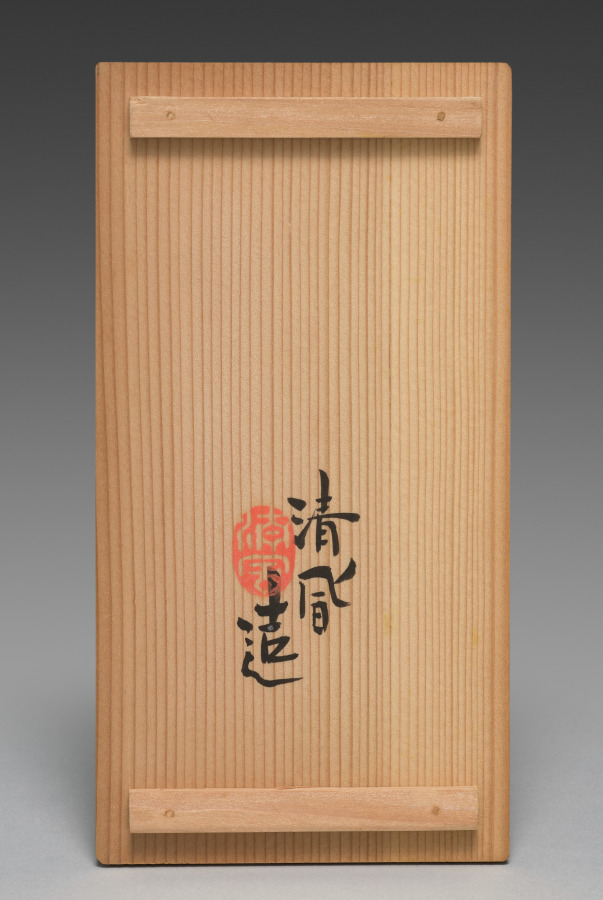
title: Sake Pourers with Crane and Tortoises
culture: Japan, Meiji period (1868–1912)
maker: Seifū Yohei III (Japanese, 1851–1914)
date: 1893–1914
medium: Pair of sake flasks; porcelain with overglaze color enamel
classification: Ceramic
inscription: 爭食羣雞前，同遊者同志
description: One flask of this pair has stencil-like paintings of three turtles—a young one with its parents—while the other has a crane with a leg raised. Cranes and turtles are well-recognized symbols of longevity in East Asia, with the turtle said to live for ten thousand years and the crane for one thousand. Each flask also has a poem on the back, one in Chinese and the other in Japanese. The latter, which appears on the turtle flask, reads kame iwaku kamiyo wa, ore no wakaki toki. The seventeen-syllable poem begins with “turtle” and ends with “when I was young.” It can be translated as, “the turtle said the world of the gods began when I was young.” The poem on the crane flask is two nonconsecutive five-character lines from a poem called “Crane Feelings” by the famous Tang dynasty poet Bai Juyi (772–846). One character in one of the lines has been altered. This creative poetic sampling results in a verse reading zheng shi qun ji qian, tong you zhe tong zhi 爭食羣雞前，同遊者同志. It could perhaps be translated, “before the flock of chickens competing for food, those traveling together have the same ambitions.”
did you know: This pair of seemingly humble sake pourers celebrate longevity and delight in a literary tradition that embraces multiple forms of poetic expression.